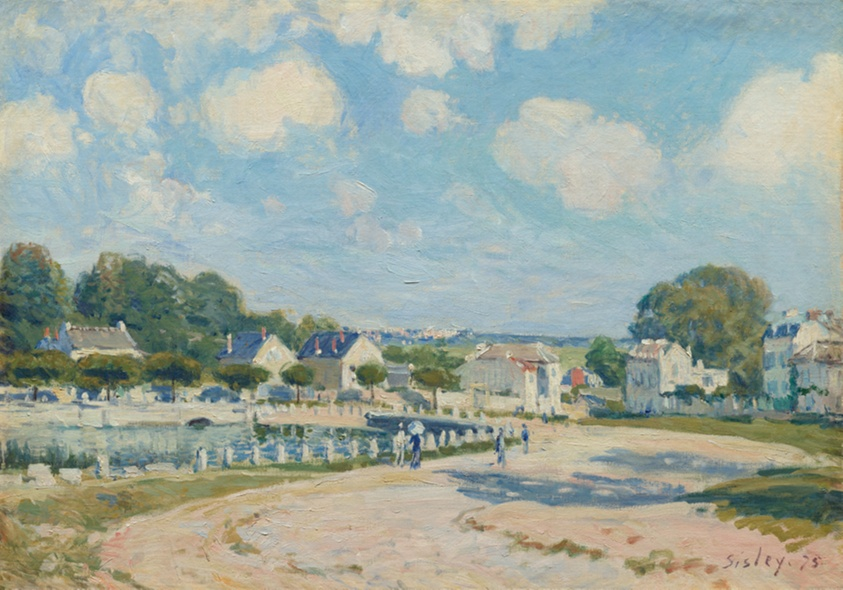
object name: Painting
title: Watering Place at Marly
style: Impressionism, nineteenth century, 19th century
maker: Alfred Sisley (French, 1839–1899)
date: 1875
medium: Oil on canvas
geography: France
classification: oil on canvas; paint; oil paintings (visual works); french; painting; european painting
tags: landscape, fences, bridge, people, figure, figures, house, houses, building, buildings, trees, sky, road, paths, nature, France, clouds, leisure, weather/seasons, water, landscapes